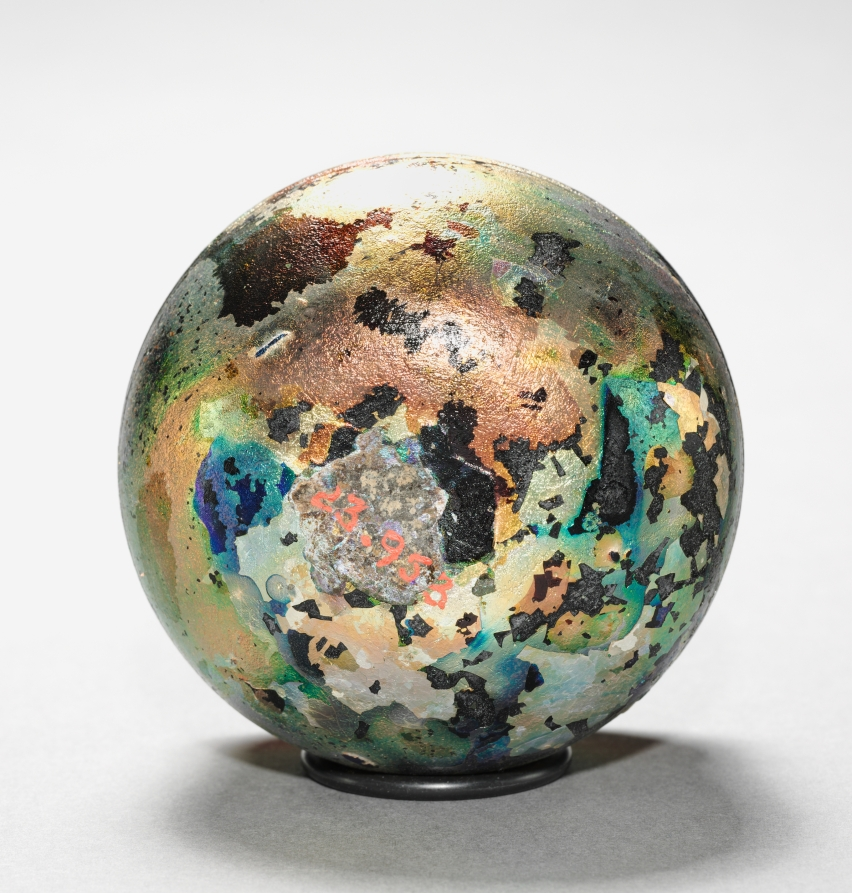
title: Goblet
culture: Italy, Roman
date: 100–300 CE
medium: glass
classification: Glass